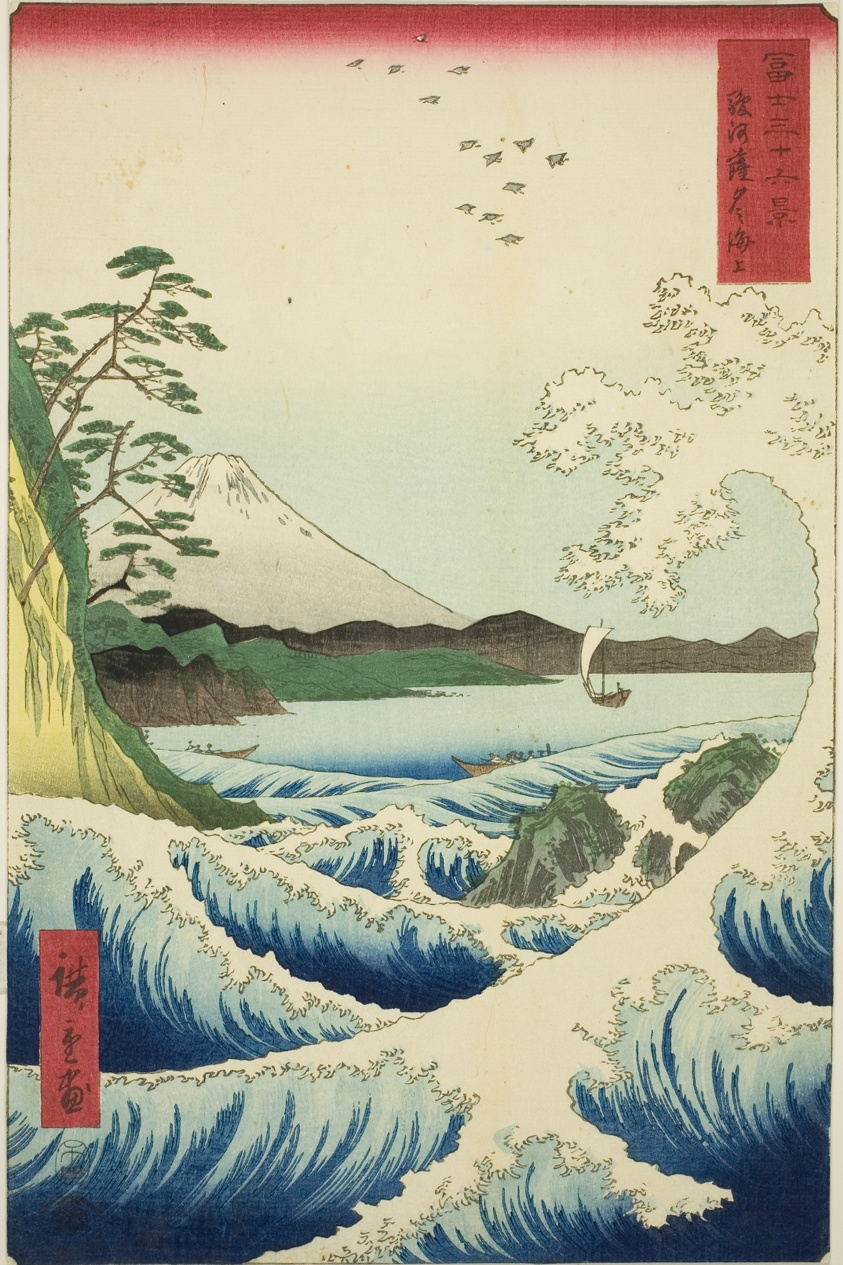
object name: Print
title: The Sea off Satta in Suruga Province (Suruga Satta no kaijo), from the series "Thirty-six Views of Mount Fuji (Fuji sanjurokkei)"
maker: Utagawa Hiroshige 歌川 広重; Japanese, 1797-1858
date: 1858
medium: Color woodblock print; oban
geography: Japan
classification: woodblock print; print; asian art